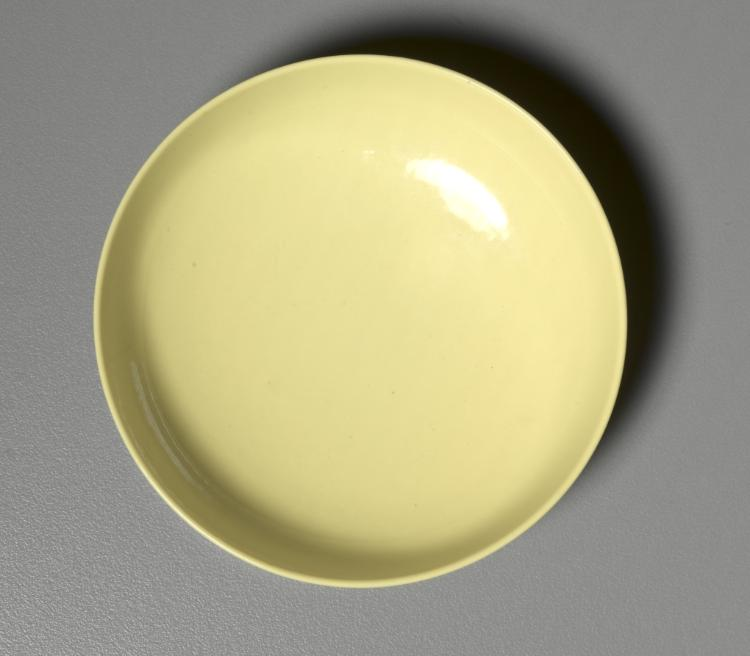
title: Small Dish with Yellow Enamel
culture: China, Qing dynasty (1644-1911), Qianlong mark and reign (1735-1795)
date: 1736–95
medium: enameled porcelain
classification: Ceramic